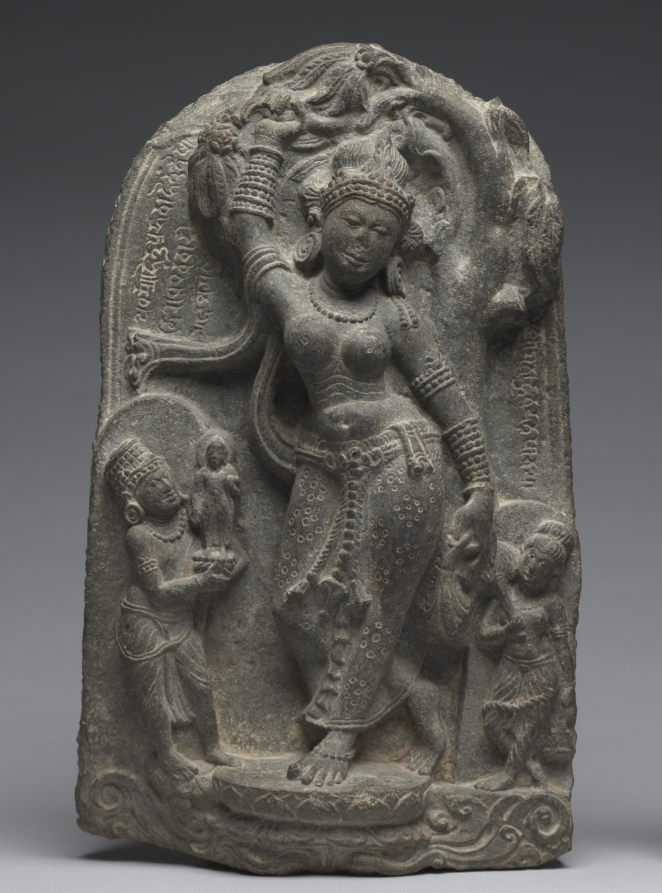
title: Birth of the Buddha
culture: Northeastern India, Bengal, Pala dynasty (730-1197)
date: 800s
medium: Black chlorite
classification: Sculpture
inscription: Phenomena arise from causes;/ The causes have been revealed by the Buddha,/ As have the means for their cessation;/ Thus has been declared by the Great Ascetic.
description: The historical Buddha known as Shakyamuni was born Prince Siddhartha around the end of the 400s BCE near the border of what is today India and Nepal. His mother, Queen Maya, was traveling from her husband’s capital to her family home to give birth, but the baby came early and was born in a grove of shala trees. The miraculous circumstances of his birth are related in a number of textual sources. They state that he emerged from her right side, so Queen Maya here is shown grasping the branch of a tree with her right hand raised, like a nature divinity. The baby was received by Indra, king of the gods, and immediately he took seven steps. The figure at the lower right is Brahma, the Hindu god of creation. In works of Buddhist art, Hindu gods appear as subservient or inferior to the Buddha. The Sanskrit inscription records a common Buddhist prayer of this period: Phenomena arise from causes; The causes have been revealed by the Buddha, As have the means for their cessation; Thus has been declared by the Great Ascetic.